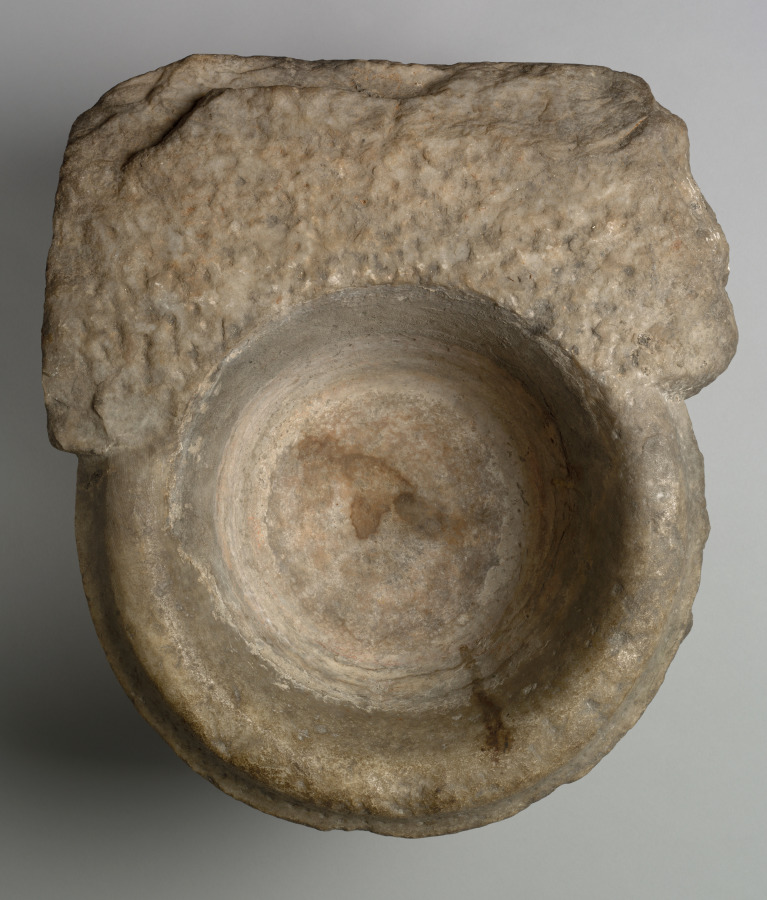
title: Holy Water Font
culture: Southern France, late 15th century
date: late 1400s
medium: marble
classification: Sculpture